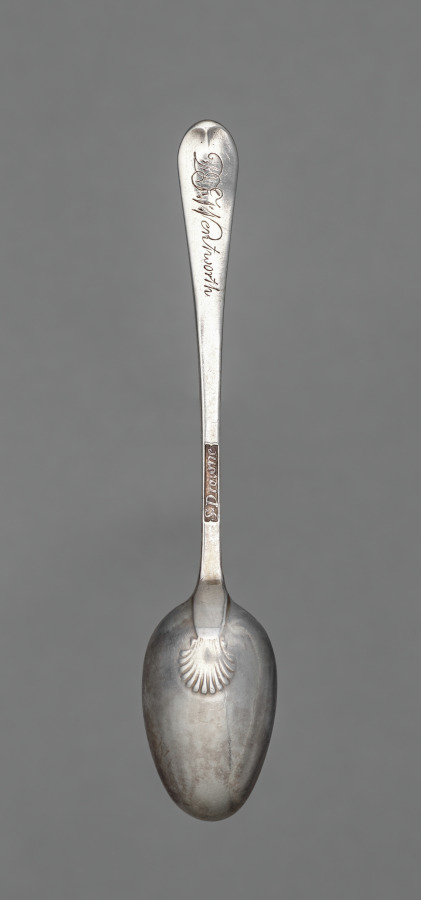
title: Teaspoon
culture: America, New Hampshire, Portsmouth, 18th century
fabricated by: Samuel II Drowne (American, 1749–1815)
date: c. 1770–1780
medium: silver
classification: Silver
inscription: engraved "M+F" in block letters on top of handle end, and "D.F.Wentworth" (later) in script on back of handle end.